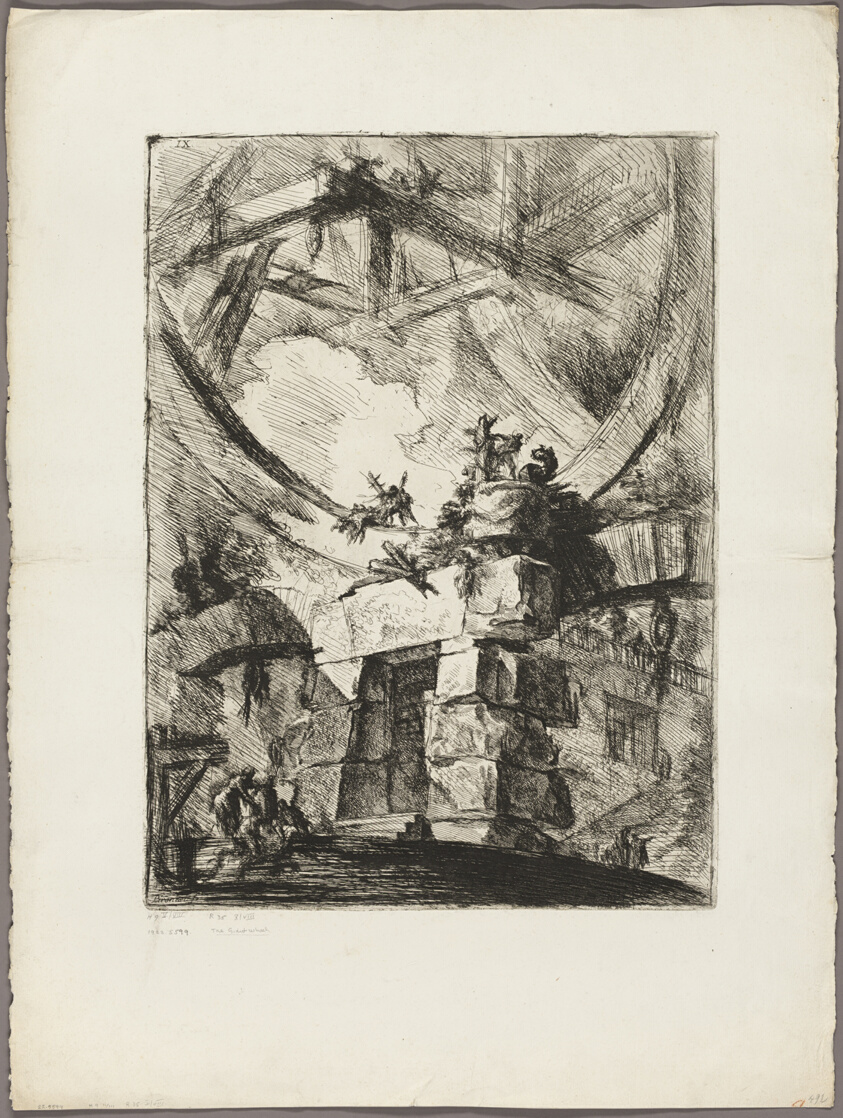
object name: Print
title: The Giant Wheel, plate 9 from Imaginary Prisons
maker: Giovanni Battista Piranesi (Italian, 1720-1778)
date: 1761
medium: Etching and engraving on heavy ivory laid paper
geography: Italy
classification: etching; print; prints and drawing